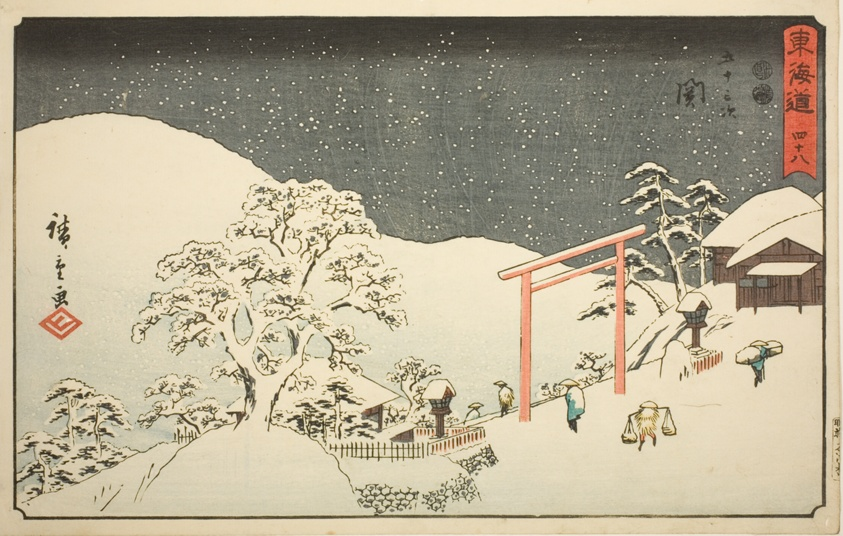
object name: Print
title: Seki—No. 48, from the series "Fifty-three Stations of the Tokaido (Tokaido gojusan tsugi)," also known as the Reisho Tokaido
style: Japanese (culture or style)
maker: Utagawa Hiroshige 歌川 広重; Japanese, 1797–1858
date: c. 1847/52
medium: Color woodblock print; oban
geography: Japan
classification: woodblock print; print; asian art